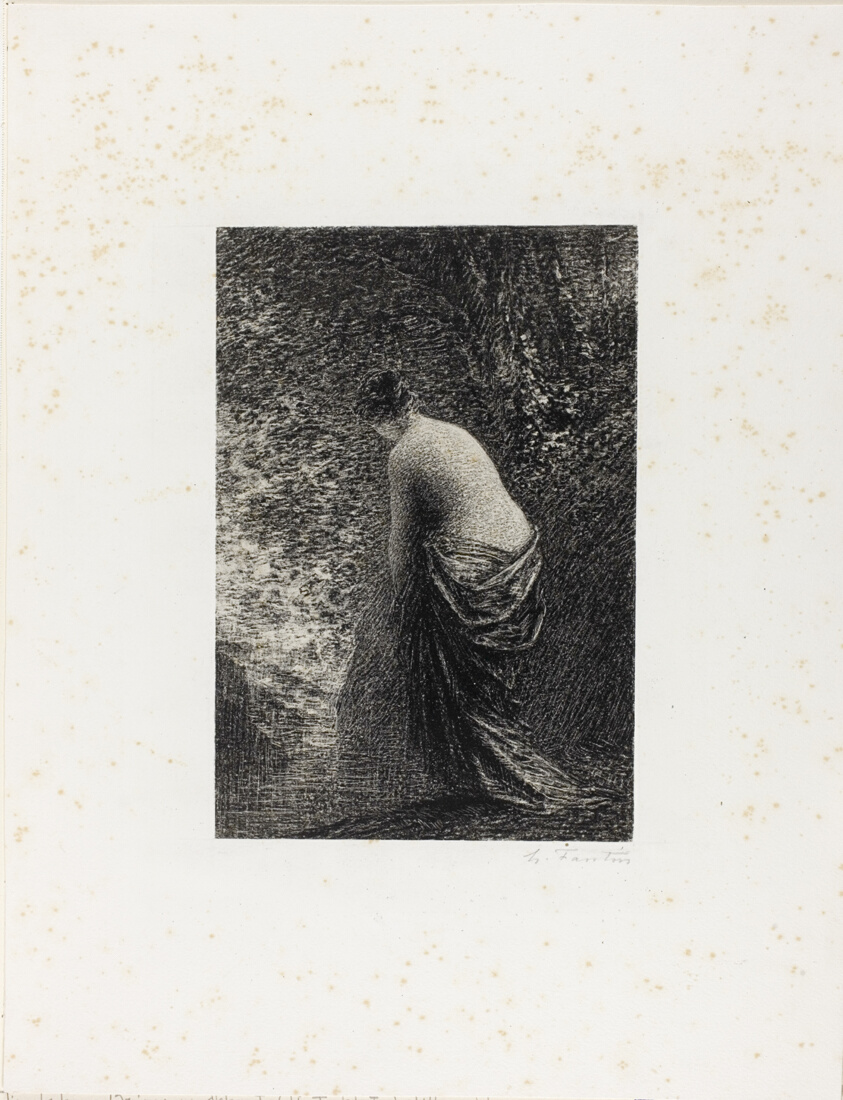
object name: Print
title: Standing Bather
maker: Henri Fantin-Latour (French, 1836-1904)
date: 1879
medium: Lithograph in black on ivory China paper laid down on white wove paper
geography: France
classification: lithograph; print; prints and drawing